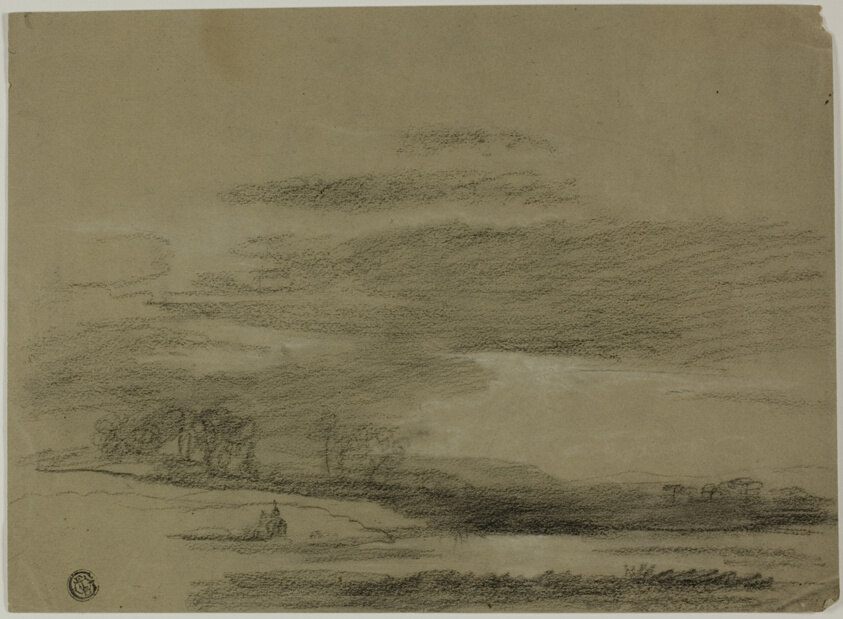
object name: Drawing and Watercolor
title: Landscape with Sun Breaking Through Clouds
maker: Unknown Artist; European, n.d.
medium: Charcoal, heightened with white chalk, on grayish-brown wove paper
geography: Europe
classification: charcoal; drawings (visual works); prints and drawing